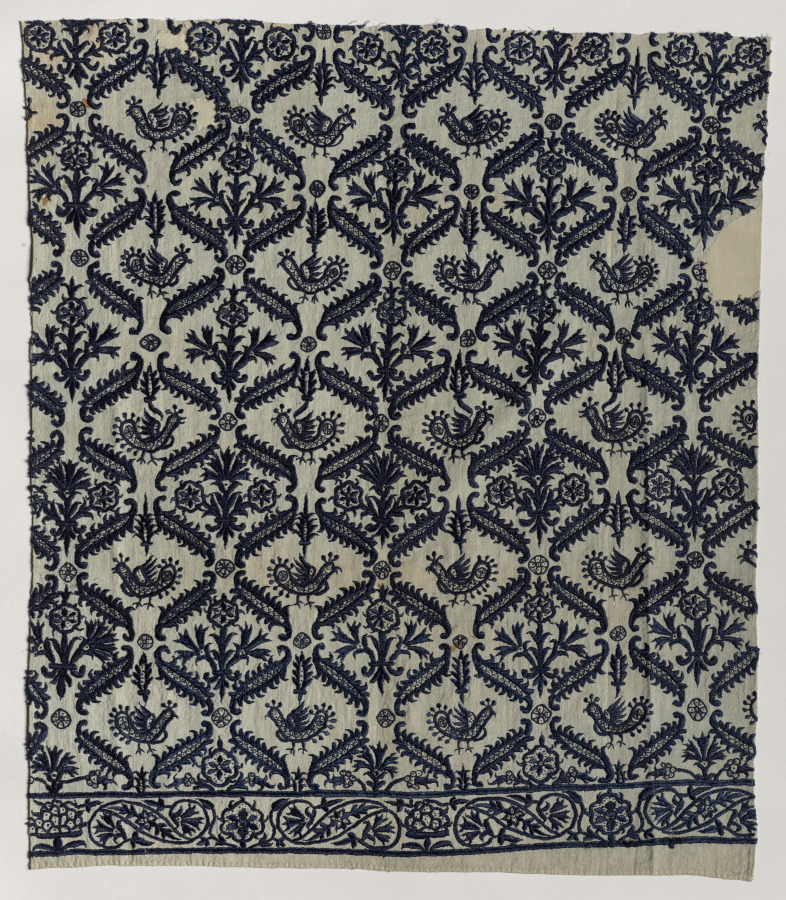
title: Fragment of a Bed Curtain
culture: Greece, Crete, 17th-18th century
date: 1600s - 1700s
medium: embroidery: silk on linen tabby ground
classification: Embroidery